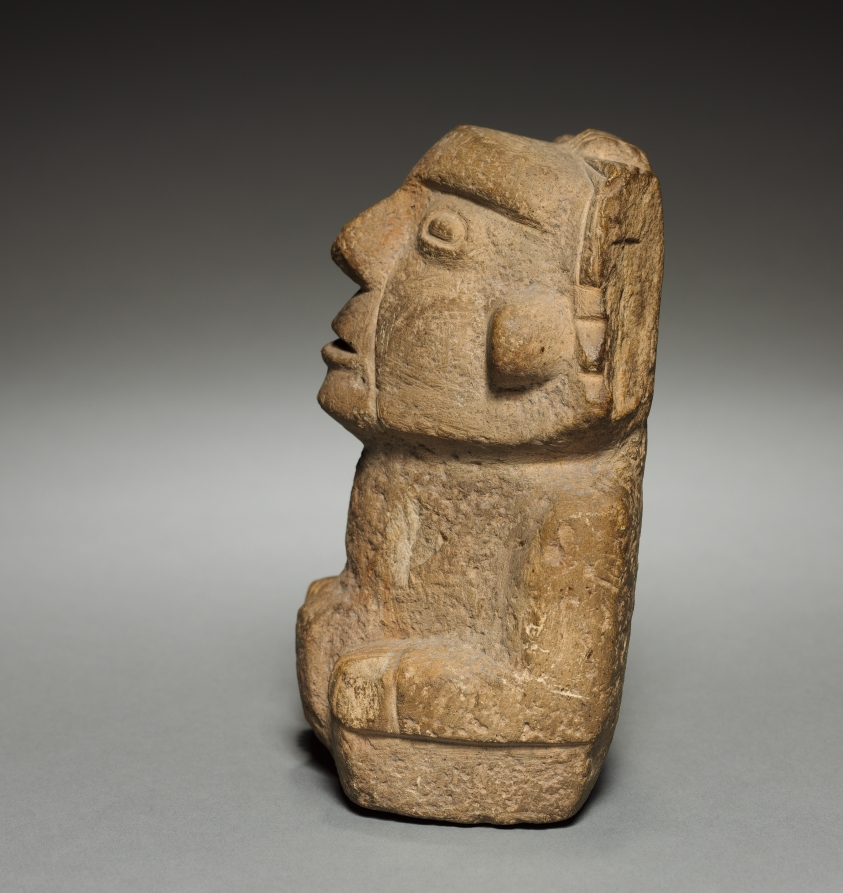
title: Seated Figure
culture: Pre-Columbian style, 20th century (?)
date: 20th Century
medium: tan stone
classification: Sculpture